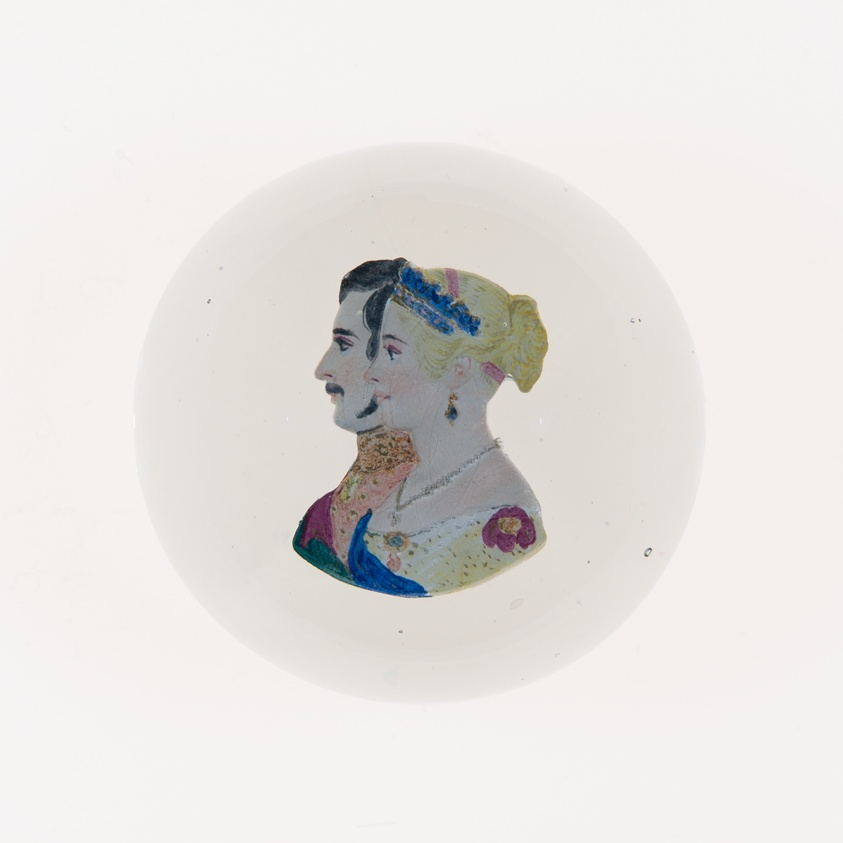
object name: Glass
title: Paperweight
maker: Saint-Louis Glassworks (Cristalleries de Saint-Louis); Lorraine, France, founded 1586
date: 19th century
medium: Glass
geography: Saint-Louis-lès-Bitche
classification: sulphide (glass); paperweight; european decorative arts; glass